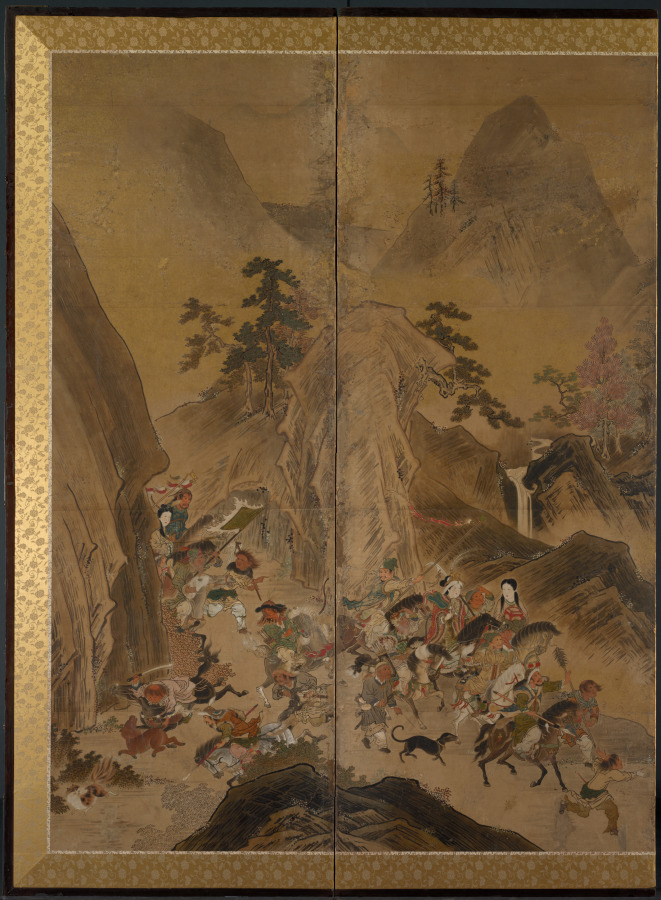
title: Tartars Hunting in a Mountain Landscape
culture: Japan, Edo period (1615–1868)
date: first half of 1600s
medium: six-panel folding screen; ink, color, and gold on paper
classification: Painting